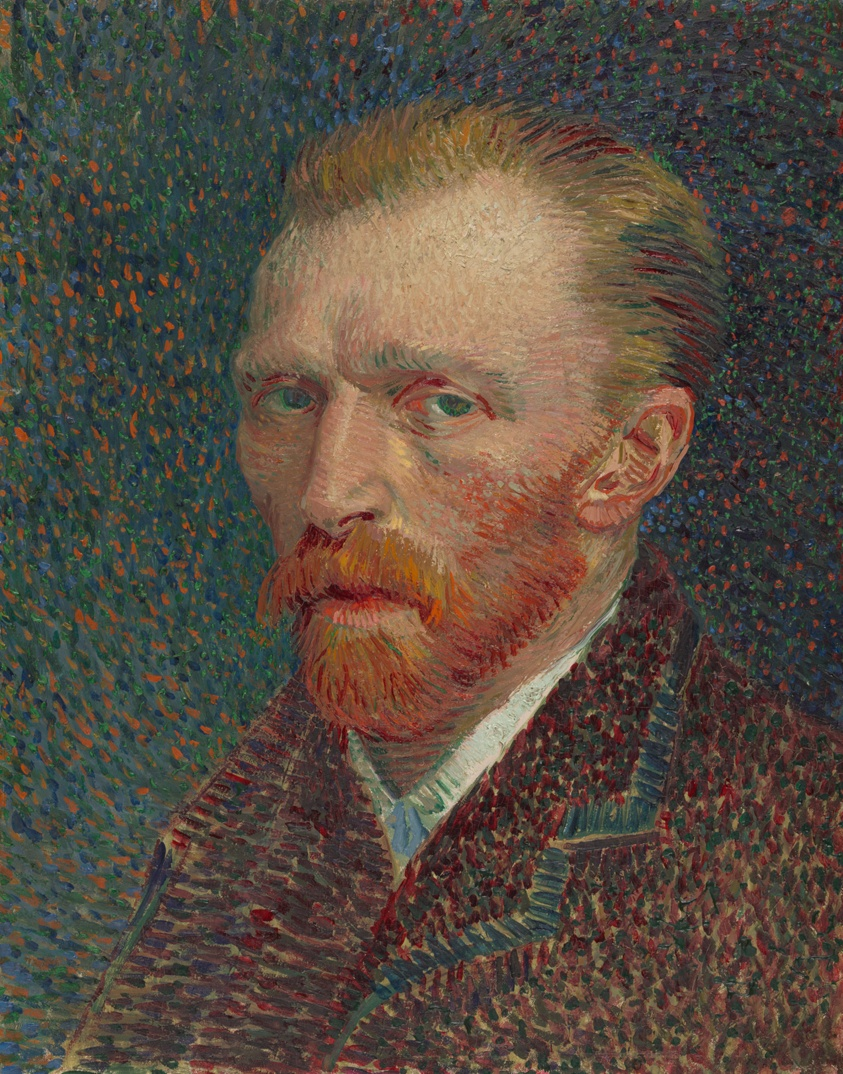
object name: Painting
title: Self-Portrait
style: Post-Impressionism, 19th century, nineteenth century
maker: Vincent van Gogh (Dutch, 1853–1890)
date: 1887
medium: Oil on artist's board, mounted on cradled panel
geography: Netherlands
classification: oil on board; dutch; oil paintings (visual works); paint; portrait; painting; european painting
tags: portraits, red (color), blue (color), green (color), orange (color), artist, self-portraits, emotions, men, suits, beards